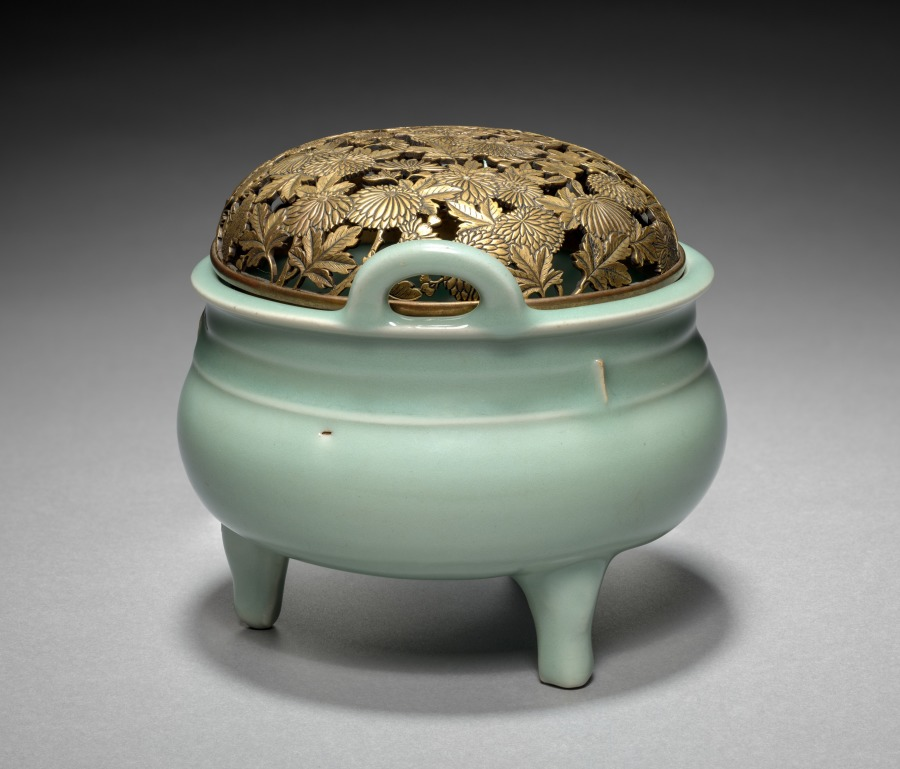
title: Covered Incense Burner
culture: Japan, Meiji period (1868–1912)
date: late 1800s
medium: Porcelain with gilt bronze cover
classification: Ceramic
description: This incense burner emulates Chinese porcelain in its glaze and form. A number of prominent Meiji-period ceramicists explored classical Chinese forms and glazes even as they also produced stoneware with Japanese-style glazes.